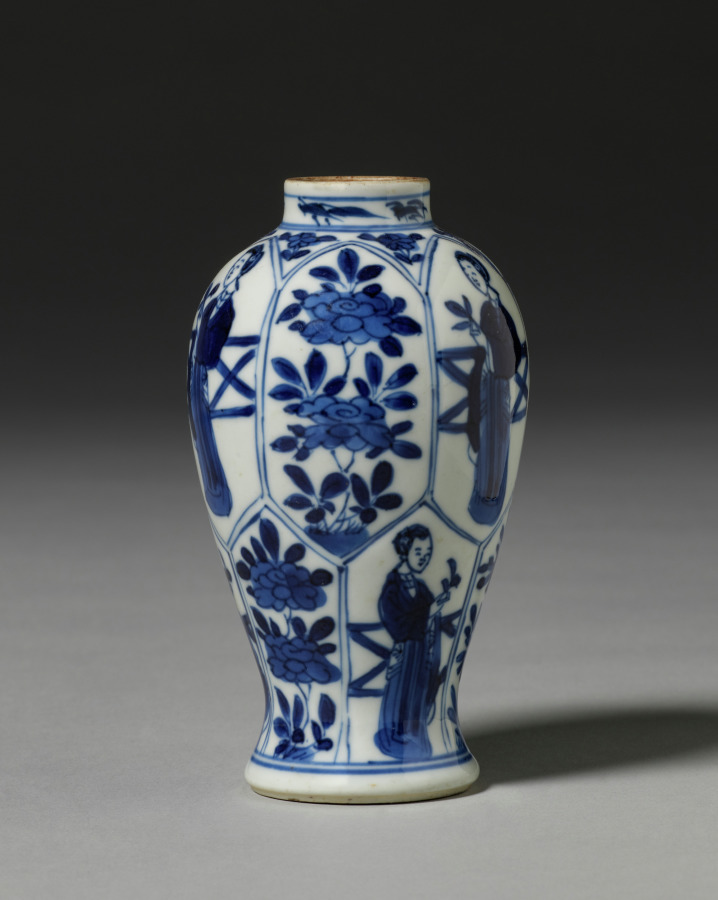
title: Jar with Cover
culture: China, Qing dynasty (1644-1911)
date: 19th Century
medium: porcelain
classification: Ceramic